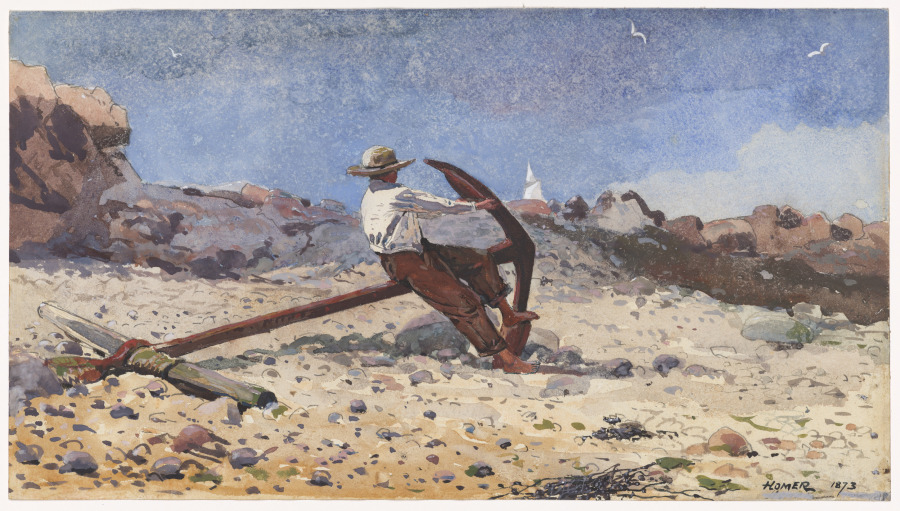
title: Boy with Anchor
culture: America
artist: Winslow Homer (American, 1836–1910)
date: 1873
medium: watercolor and gouache with graphite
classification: Drawing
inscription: signed, lower right, in black watercolor: homer 1873; signed, lower right, in black watercolor: homer 18[illegible, partially painted out]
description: In this work from a series of watercolors produced in Gloucester, MA, in the summer of 1873 Winslow Homer evokes the fraught nature of the local fishing industry by focusing not on the perilous work of adults, but rather the children they leave behind. In Boy with Anchor, the massive anchor pointing toward the sea foreshadows the weight of the boy’s maritime destiny. The work is an early example of Homer's talent for evoking atmospheric effects and his interest in technical variety. Presumably working outdoors, Homer layered fluent washes of blue, gray, and brown transparent watercolor over his graphite underdrawing to flesh out the beach and sky. He built up the hot, pebble-studded surface of the beach by using dense gouache to draw textural detail and created the broken cloud pattern in the sky by lightly blotting his wet blue wash. The picture’s formal tensions between warm and cool colors, outline and wash, and transparency and opacity mirror the emotional tension of the scene.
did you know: The mottled texture of the sky is an example of Homer’s blotting technique—a subtractive process in which he applied a wash of water, sprinkled some breadcrumbs, and then gently rubbed the paper with his fingers in order to absorb the extra color, leaving behind a granulated texture.